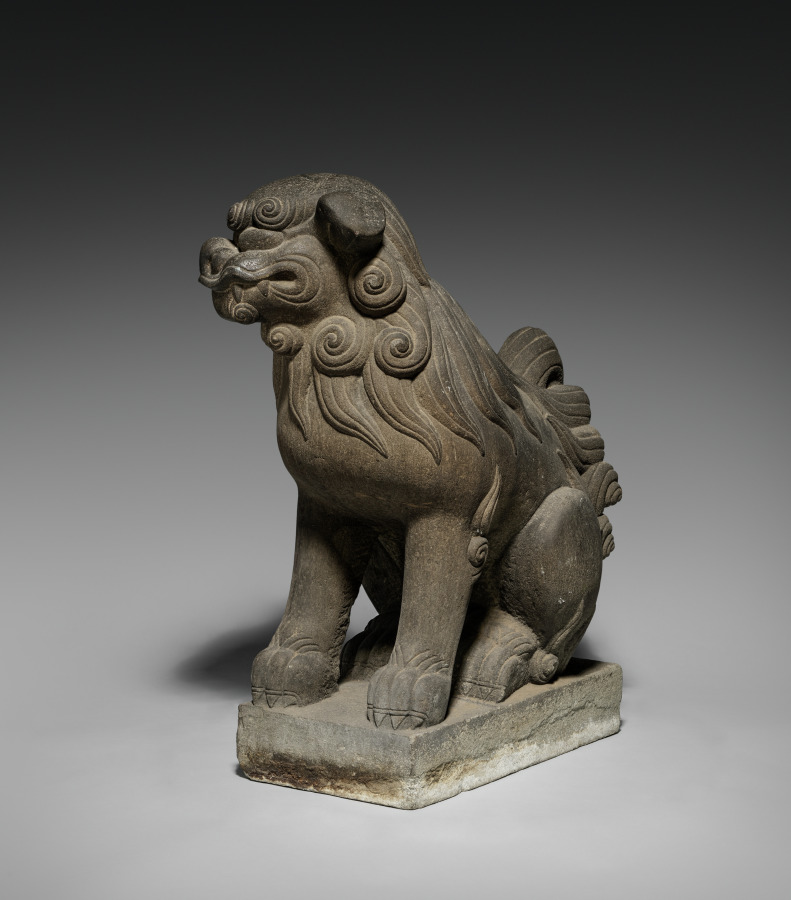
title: Lion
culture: Japan?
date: c. 1800s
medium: gray schist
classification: Sculpture